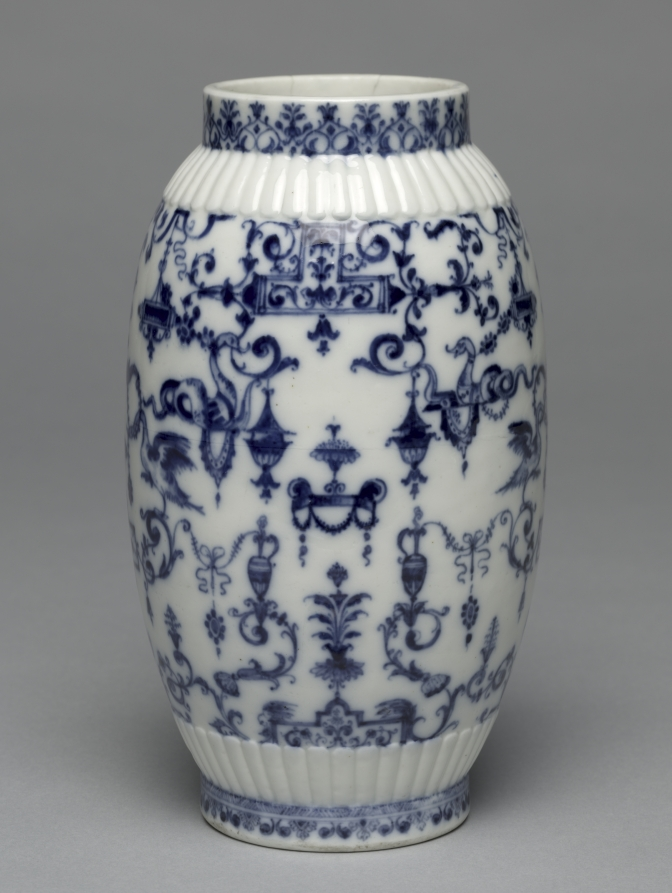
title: Vase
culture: France, St. Cloud, late 17th-early 18th Century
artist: attributed to Saint Cloud Porcelain Factory (French)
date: c. 1695–1700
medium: Molded soft-paste porcelain with blue underglaze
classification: Ceramic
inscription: "55"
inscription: "KR paiz"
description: This vase’s decoration demonstrates the converging influence of Chinese and Italian art on French porcelain manufacture. Early production at the Saint-Cloud factory was inspired by blue and white Chinese porcelain. Books of grotesque designs popular during the Italian Renaissance and published by Jacques Androuet Du Cerceau provided models for this vase’s ornament including its interlacing garlands, swans, and snakes.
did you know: This vase may have been part of a garniture, a decorative set of matching porcelain intended to be displayed together.